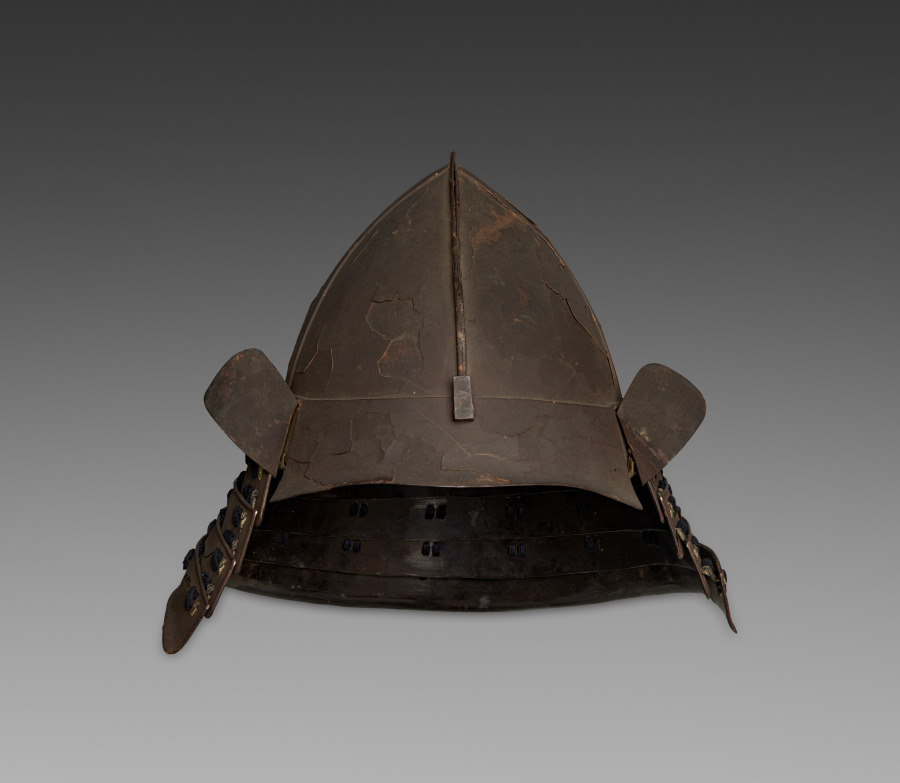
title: Helmet (Kabuto)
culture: Japan, Edo period (1615–1868)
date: 1615–1868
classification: Arms and Armor